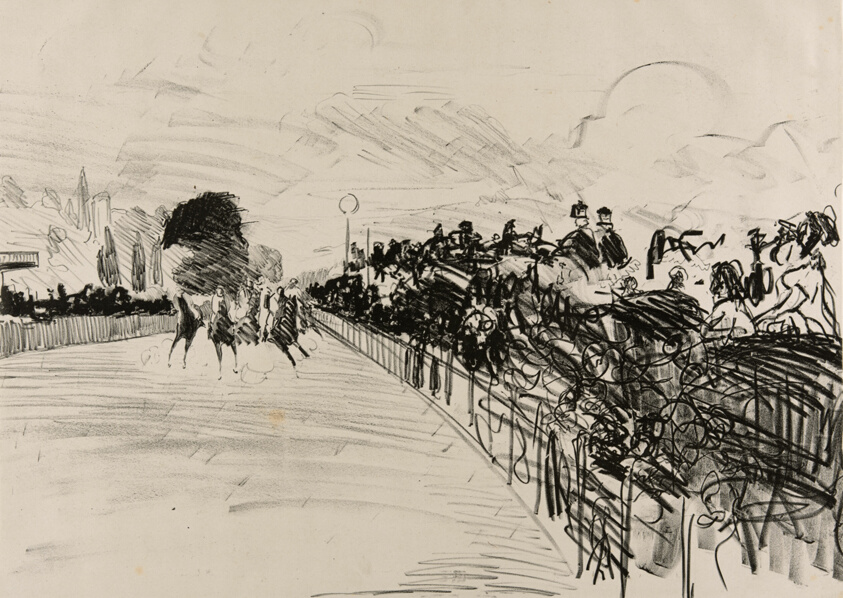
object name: Print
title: The Races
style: Impressionism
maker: Édouard Manet (French, 1832-1883)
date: 1865/72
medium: Lithograph in black on ivory chine, laid down on ivory wove paper (chine collé)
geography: France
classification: lithograph; print; prints and drawing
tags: circles, landscapes, leisure